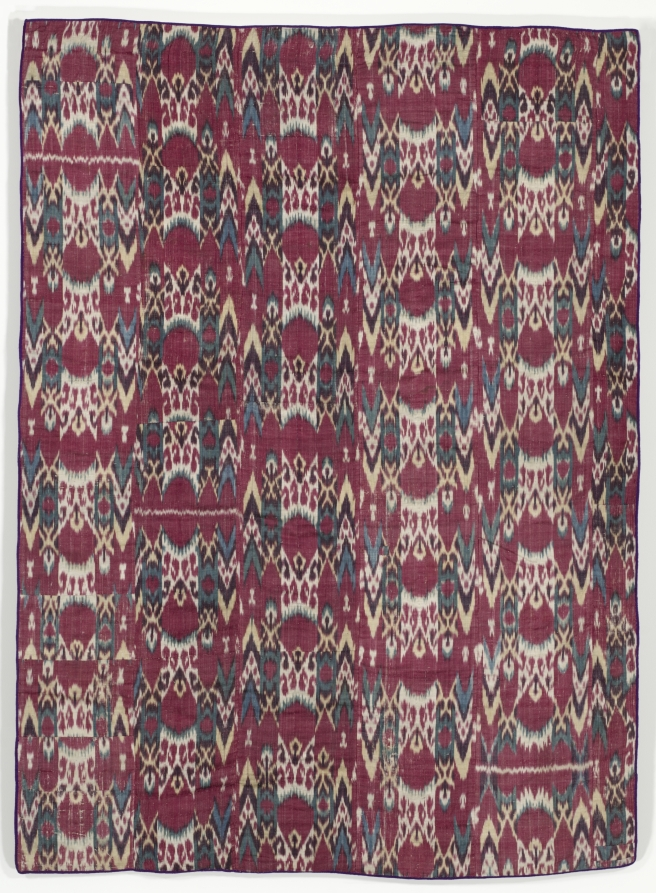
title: Wall hanging (pardah)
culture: Uzbekistan, Bukhara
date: 1800–1850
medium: warp ikat, warp-faced plain weave; silk warp, cotton weft; 5-1/2 panels/ original lining: block printed cotton, plain weave; 3 panels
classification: Textile